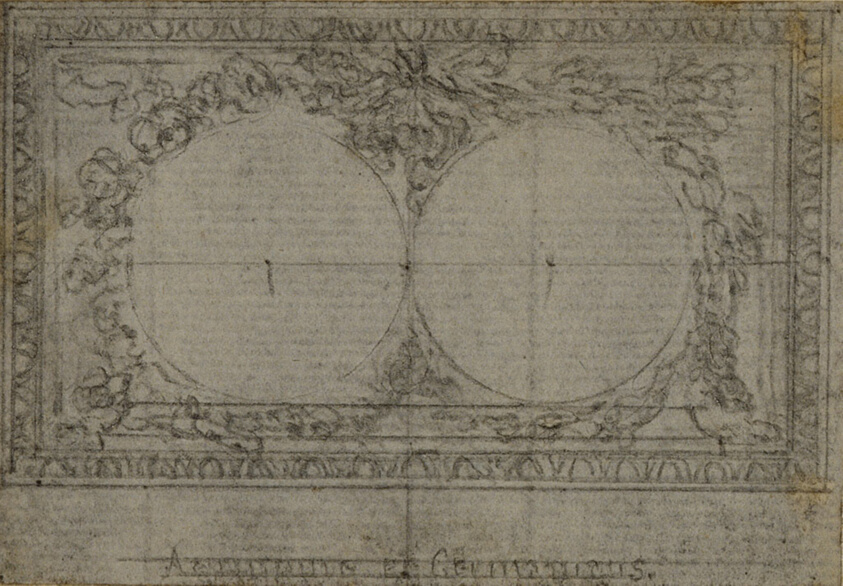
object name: Drawing and Watercolor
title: Study for Medallions, in Tacitus "Tibère, ou Les Six Premiers Livres des Annales", Book III, Vol. 2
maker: Hubert François Gravelot (French, 1699-1773)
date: c. 1768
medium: Graphite, on gray laid paper, incised for transfer and perimeter mounted on ivory laid paper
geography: France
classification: graphite; drawings (visual works); prints and drawing